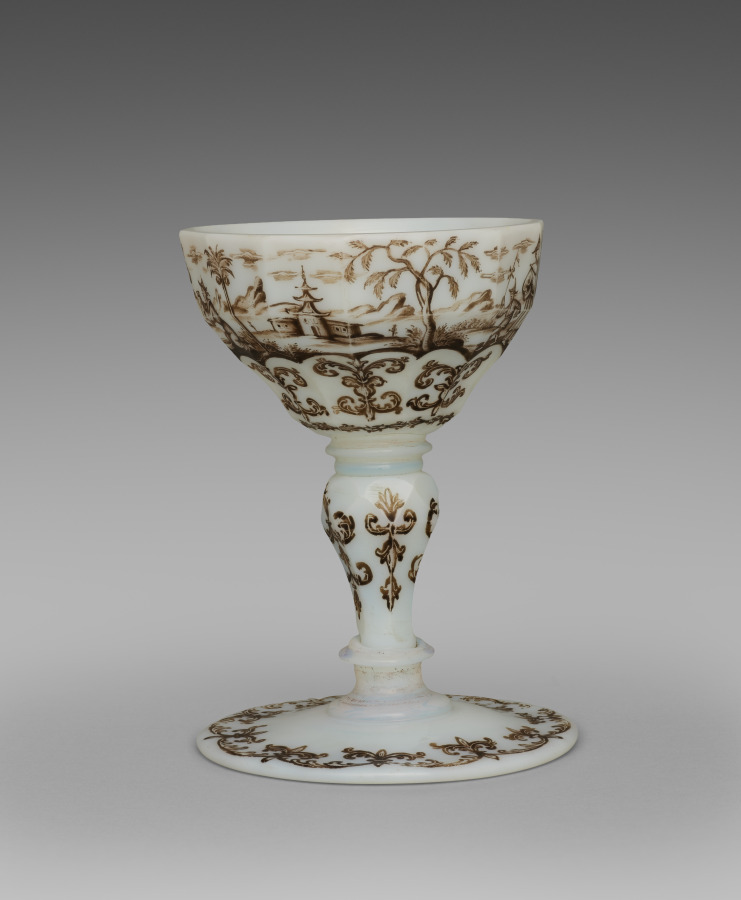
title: Cup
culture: Bohemia, 18th century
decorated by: Ignaz Preissler (Bohemian, 1676–1741)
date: c. 1735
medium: Opal glass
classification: Glass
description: This cup may have functioned as a vessel for an alcoholic beverage or as a container for food such as candies or pastries. Ignaz Preissler’s specialty was a technique known as Schwarzlot (“black lead” in German), in which a design was painted with black enamel and then fine details were scratched out with a needle. Preissler’s clients were primarily aristocrats who commissioned vessels as gifts or commemorative items and for whom the chinoiseriedecoration (imaginary European interpretations of Asian cultures), seen here, was fashionable.